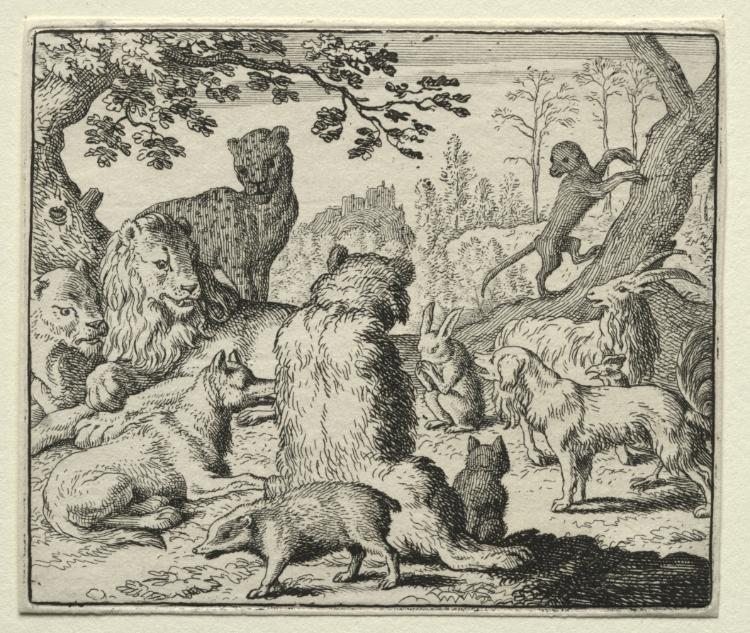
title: Reynard the Fox: Lion Orders Search for Reynard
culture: Netherlands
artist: Allart van Everdingen (Dutch, 1621–1675)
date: 1650–75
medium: etching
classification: Print